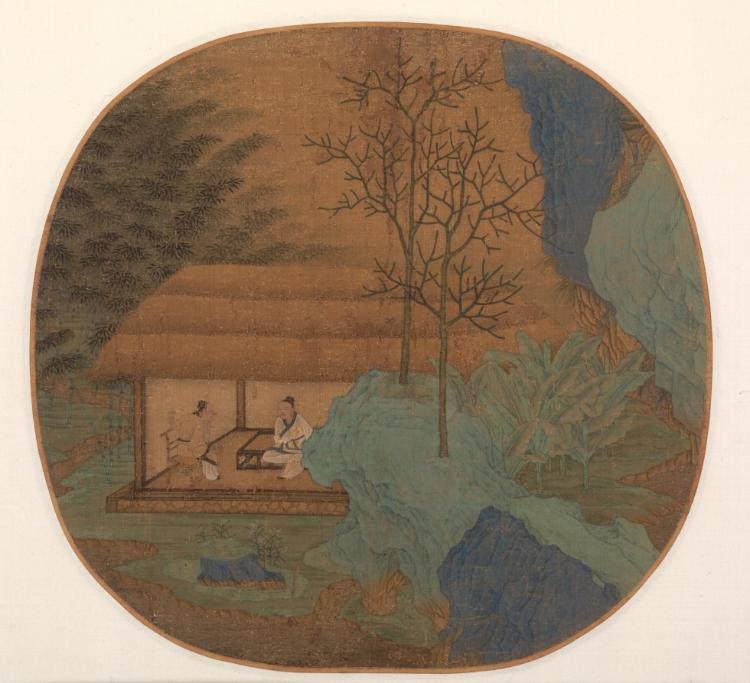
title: Conversation in a Thatched Hut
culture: China, Southern Song dynasty (1127-1279)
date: late 1200s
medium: album leaf; ink and color on silk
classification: Painting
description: Two scholars in white robes sit conversing in a simple hut before a bamboo grove. The foreground and right side are filled with two spindly trees and a grove of banana trees among rugged rocks and precipices, all drawn in ink outline and filled in with opaque blue and green pigment. Landscapes painted in blue and green mineral pigments often allude to the past or to paradise. Here the color may suggest that surrounded by nature, the scholars could escape the hassles of the chaotic world.